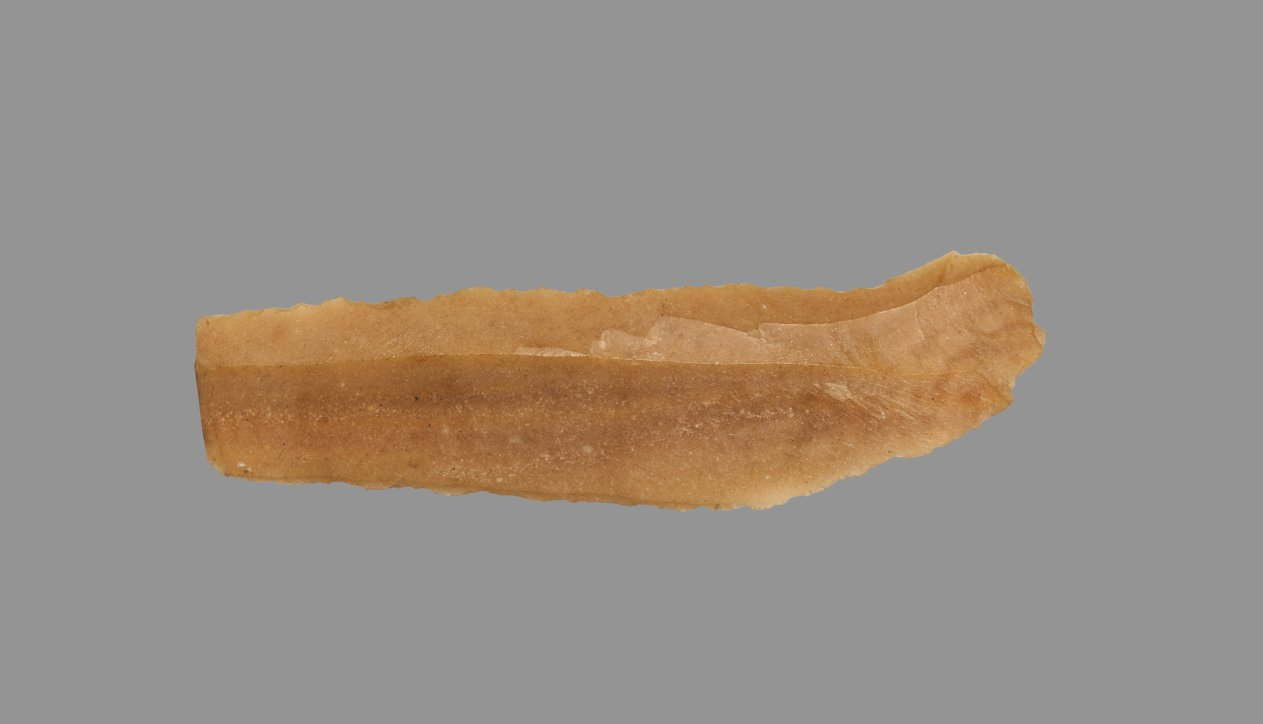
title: Sickle Blade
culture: Egypt, Middle Kingdom (2040–1648 BCE), Dynasty 12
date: 1980–1801 BCE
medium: flint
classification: Implements